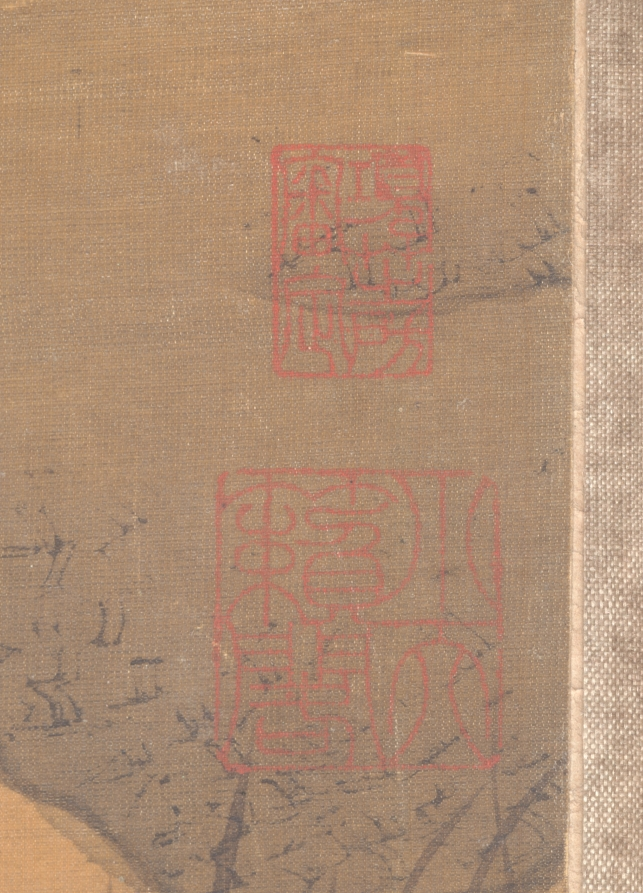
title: Xu Jingyang Moving His Family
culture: China, Ming dynasty (1368–1644)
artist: Cui Zizhong (Chinese, 1574–1644)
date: 1644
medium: Hanging scroll; ink and color on silk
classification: Painting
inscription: Artist's 2 seals: Pei-hai, Cui Zizhong yin.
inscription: 9 additional seals: 2 of Xiang Yuan (18th-19th c.); 1 of Tang Zuomei (late 18th-19th c.); 1 of Zhang Heng 張珩 (1915-1963); 1 of C. C. Wang 王季遷 (1907–2003); 4 unidentified.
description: Xu Jingyang was a dedicated fourth-century Confucian official who allegedly turned into a Daoist immortal. This scroll depicts the legend that when he attained immortality, he took his entire household, including chickens and dogs, to paradise. Cui Zizhong’s painting style intentionally referenced ancient masters. Typical of the pre-Song dynasty landscape tradition, there is the use of blue and green colors and an emphasis on outline rather than texture. While the trembling outlines are reminiscent of earlier painters, the flickering light on rocks and trees is a stylistic feature of Cui’s own time.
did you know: Xu Jingyang, wearing red, is in the upper register of figures, while below his servants transport a rooster, dog, and other supplies.